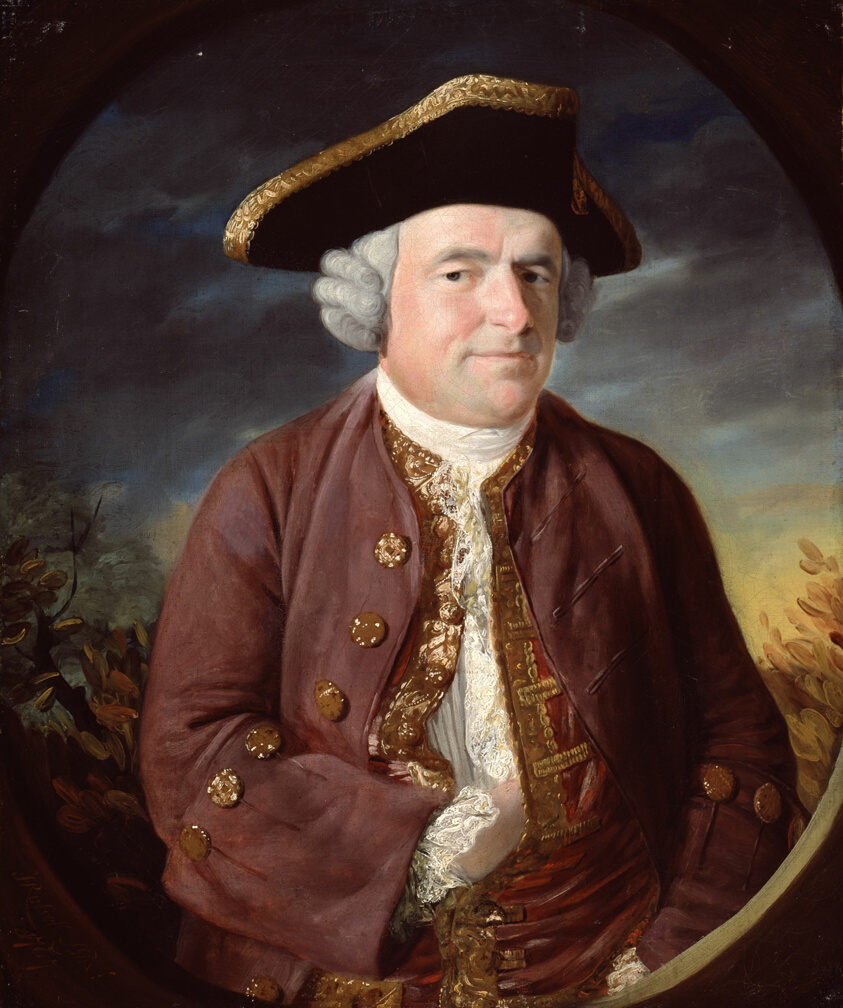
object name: Painting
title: Portrait of a Man in a Tricorn Hat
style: 18th Century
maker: John Russell (British, 1745–1806)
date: 1767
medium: Oil on canvas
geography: England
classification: oil on canvas; portrait; paint; oil paintings (visual works); british; painting; european painting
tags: portraits: male subject, portrait, portraits, hat, red (color), gold (color), jackets, sky, foliage, man